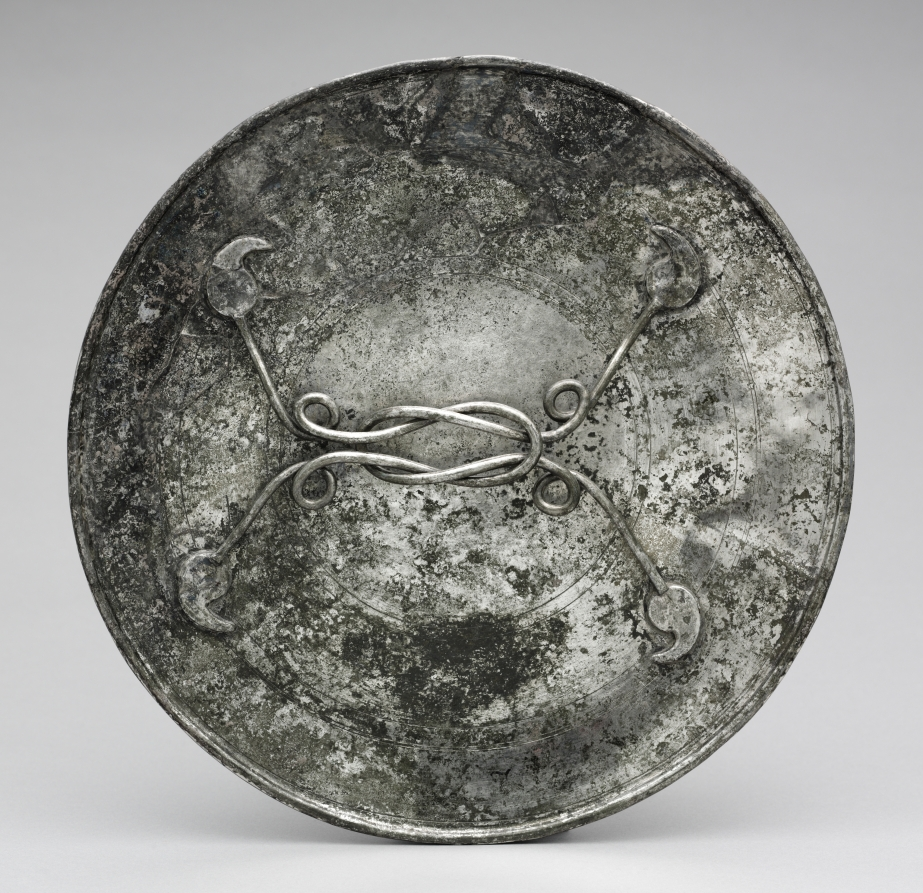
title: Mirror with a Handle in the Form of a Herakles Knot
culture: Byzantium, Syria(?), Byzantine period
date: c. 280–400 CE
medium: silver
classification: Metalwork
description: This type of mirror was introduced throughout the Roman Empire by the 2nd century and remained popular into the 3rd and 4th centuries. Similar examples have been found in Germany and Britain. The handle is made of two thick pieces of silver wire, intertwined to form a Herakles knot--a knot so complex that only someone as strong as Herakles could break it. In antiquity, knots of various kinds were believed to provide protection from harm.